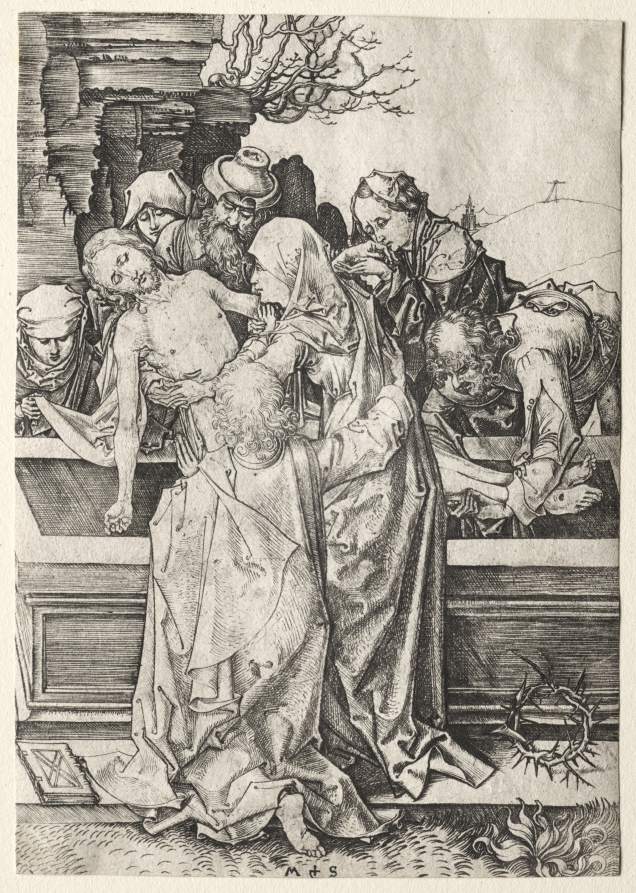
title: The Passion: The Entombment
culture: Germany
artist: Martin Schongauer (German, c. 1450–1491)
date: c. 1480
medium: engraving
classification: Print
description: Martin Schongauer's series of the Passion of Christ was his largest set of engravings, made around 1480, and extensively copied across Europe. It consists of twelve prints detailing the suffering of Christ in the last days of his life. Schongauer's version focuses on crowded scenes, grotesque physiognomies of Christ's tormentors, and great pathos in the compositions. Here, the Virgin Mary and Saint John the Evangelist are shown with their back and side to the viewer. Their attention is focused on Christ's body, which is lowered into a sarcophagus by Joseph of Arimathea and Nicodemus. Mourning women witness the entombment.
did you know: Martin Schongauer creates a sophisticated visual connection between this scene and that of the Crucifixion by including an empty cross on a hill in the distance.